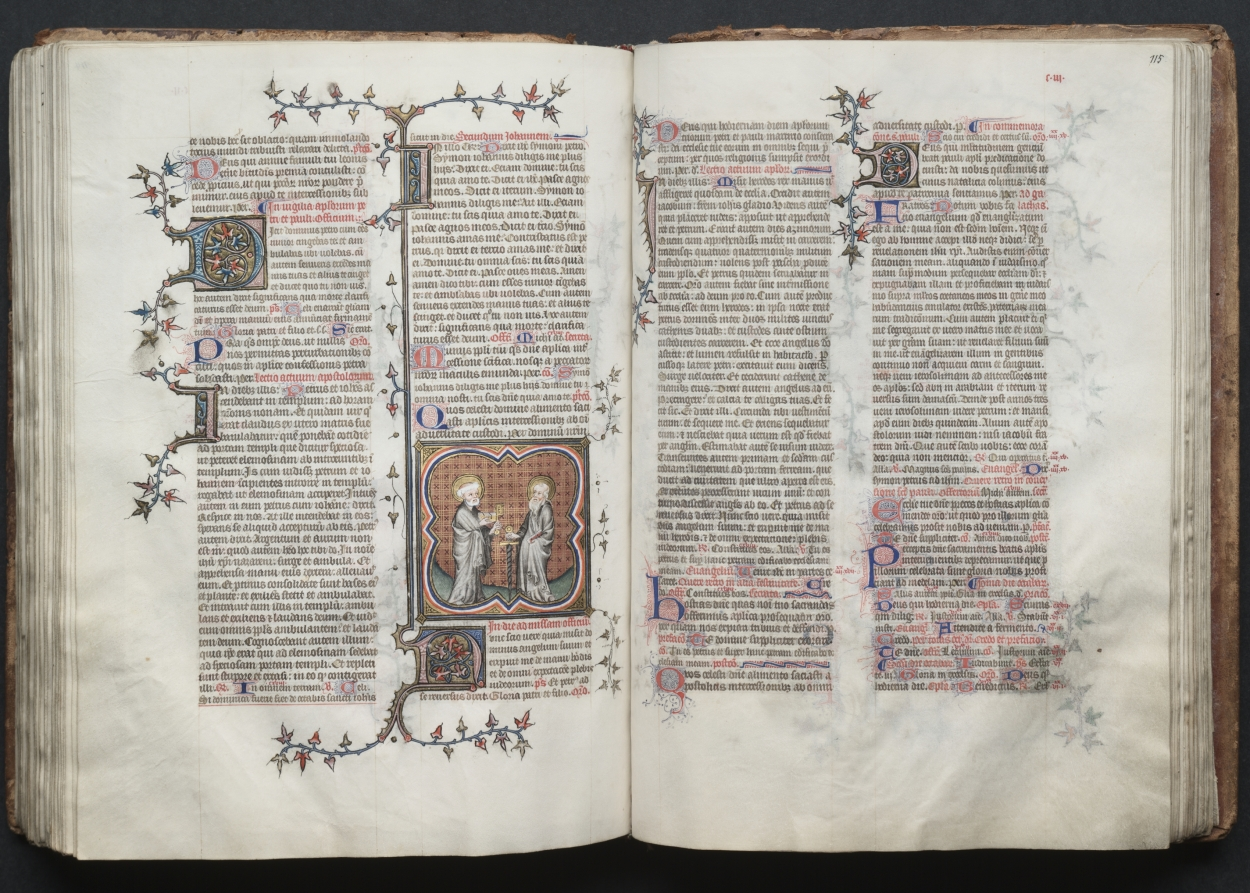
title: The Gotha Missal: Fol. 115r, Text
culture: France, Paris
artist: Master of the Boqueteaux (French)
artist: and Workshop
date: c. 1375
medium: ink, tempera, and gold on vellum; blind-tooled leather binding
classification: Bound Volume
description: The style and quality of this manuscript's decoration is typical of deluxe Parisian books made for aristocratic or royal patrons. Most of the book's decoration appears to be the work of the Master of the Boqueteaux, an artist active at the court of King Charles V (died 1380). His style was apparently shared by a number of book illuminators working in and around Paris. It is very possible that the Gotha Missal belonged to Charles V, but is not provable because the manuscript has no royal portraits and lacks a colophon. Given the book's magnificent decoration, however, it would seem that it was produced for a Valois prince, if not for the king himself. The manuscript receives its name from the German dukes of Gotha, its later owners.